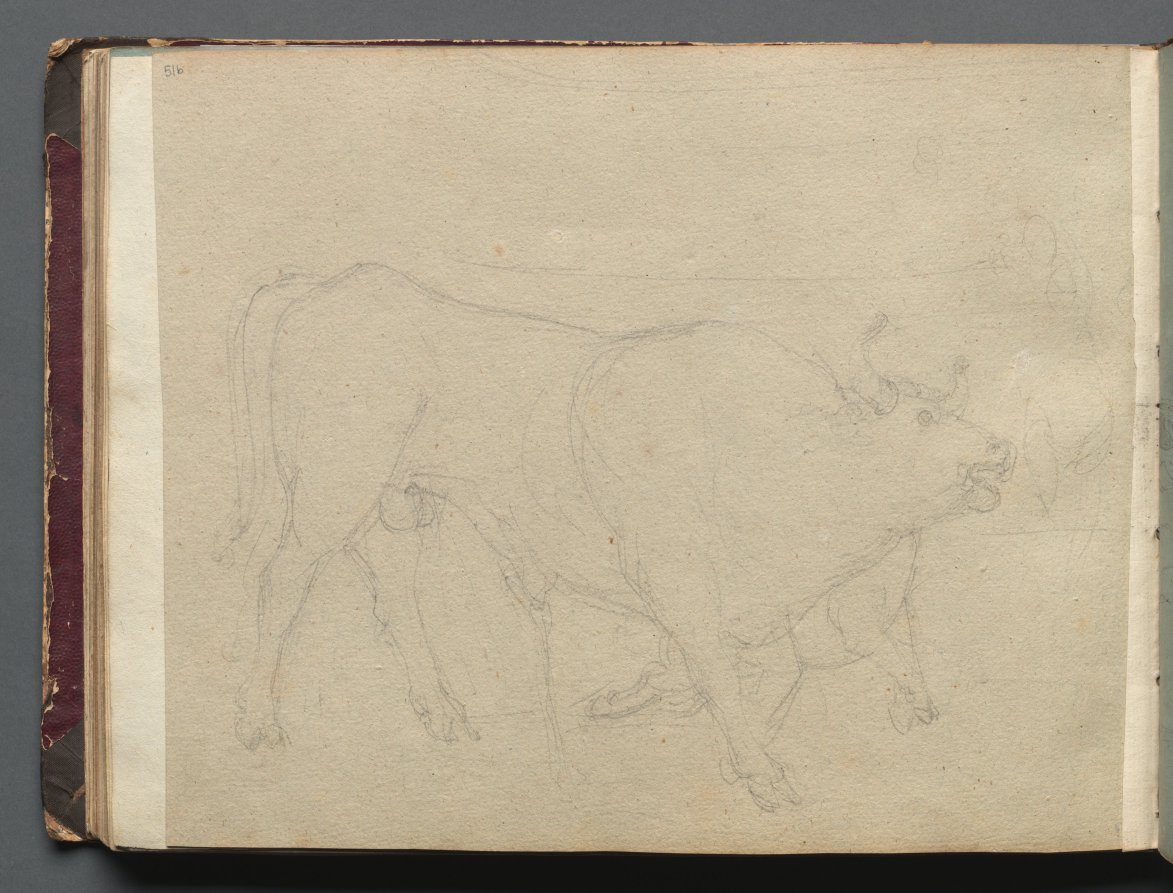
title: Album with Views of Rome and Surroundings, Landscape Studies, page 51b: Study of a Bull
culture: Germany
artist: Franz Johann Heinrich Nadorp (German, 1794–1876)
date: c. 1830s-70s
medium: graphite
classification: Bound Volume